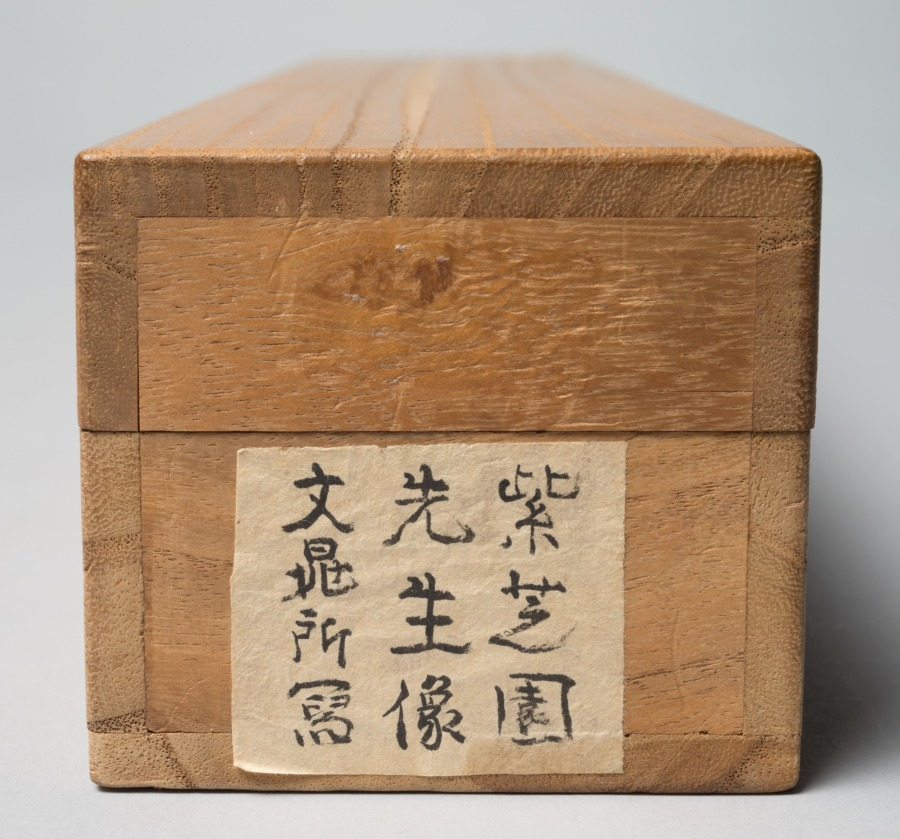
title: Imaginary Portrait of Shundai Dazai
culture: Japan, Edo period (1615–1868)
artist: Tani Bunchō (Japanese, 1763–1841)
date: late 1700s–1800s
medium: hanging scroll; ink and color on paper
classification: Painting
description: Shundai (1680–1747) was a noted Confucian scholar and writer. Brought up with a strongly Confucian family background, Bunchō’s veneration for Shundai is understandable. The inscription is by Nozawa Hikoroku, a scholar and poet contemporary with Bunchō.